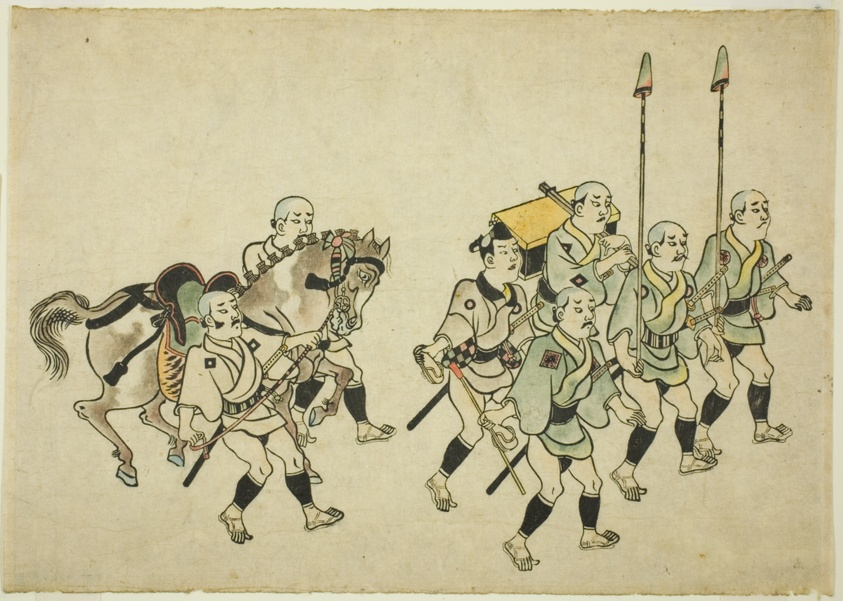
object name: Print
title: Procession of a Daimyo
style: Japanese (culture or style)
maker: Hishikawa Moronobu (Japanese, (?)-1694)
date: c. 1681/84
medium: Hand-colored woodblock print; oban yoko-e, sumizuri-e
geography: Japan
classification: woodblock print; print; asian art